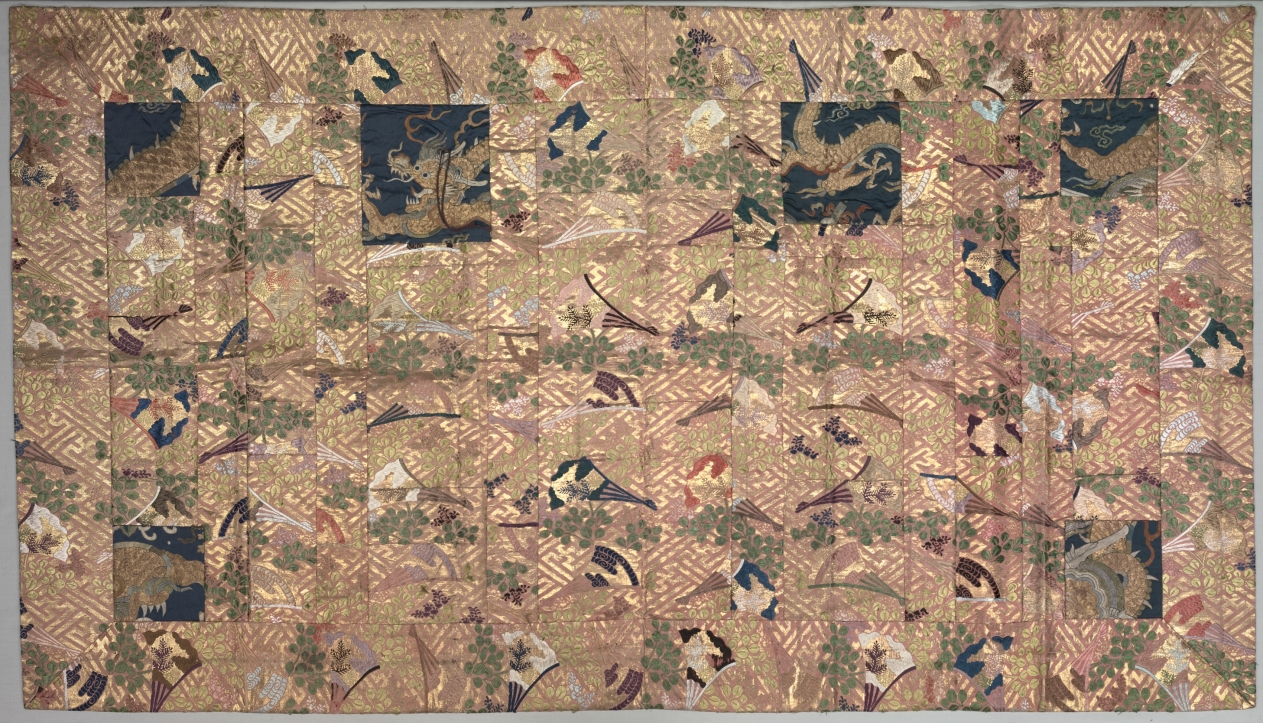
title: Buddhist Priest Robe (Kesa)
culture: Japan, Edo period (1615-1868) or Meiji period (1868-1912), 19th century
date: 1800s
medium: silk, brocaded; metal thread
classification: Garment